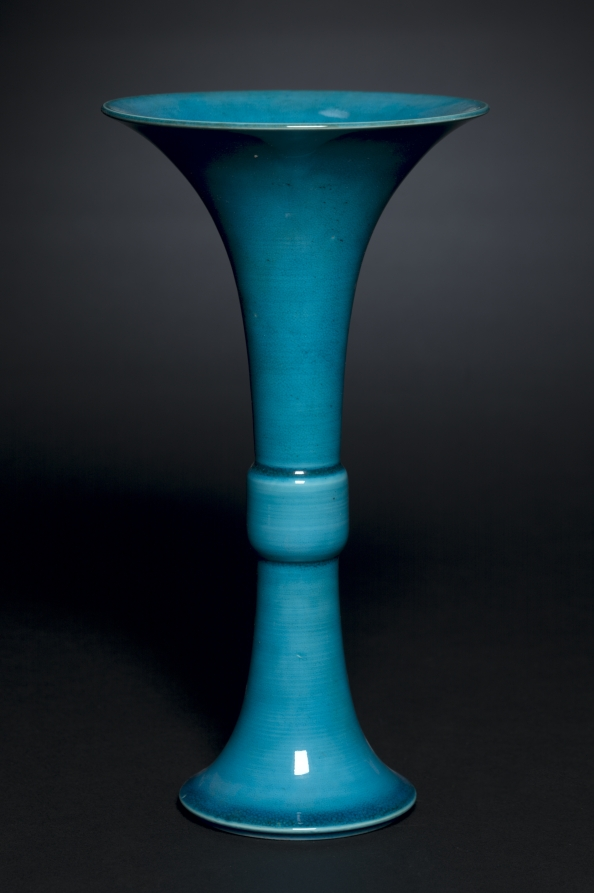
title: Beaker Vase in Form of Archaic Gu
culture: China, Jiangxi province, Jingdezhen kilns, Qing dynasty (1644-1911), Kangxi mark and reign (1662-1722)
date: 1662–1722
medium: porcelain with peacock-blue glaze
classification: Ceramic